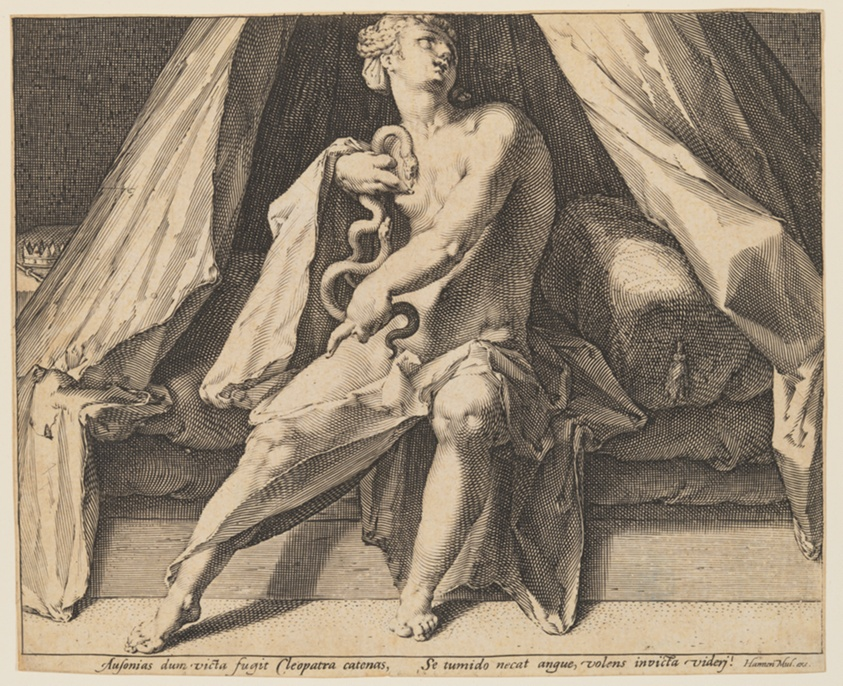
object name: Print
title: Cleopatra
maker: Jan Harmensz Muller; Dutch, 1571–1628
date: c. 1590-95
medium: Engraving on ivory laid paper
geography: Netherlands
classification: print; paper; prints and drawing; engraving